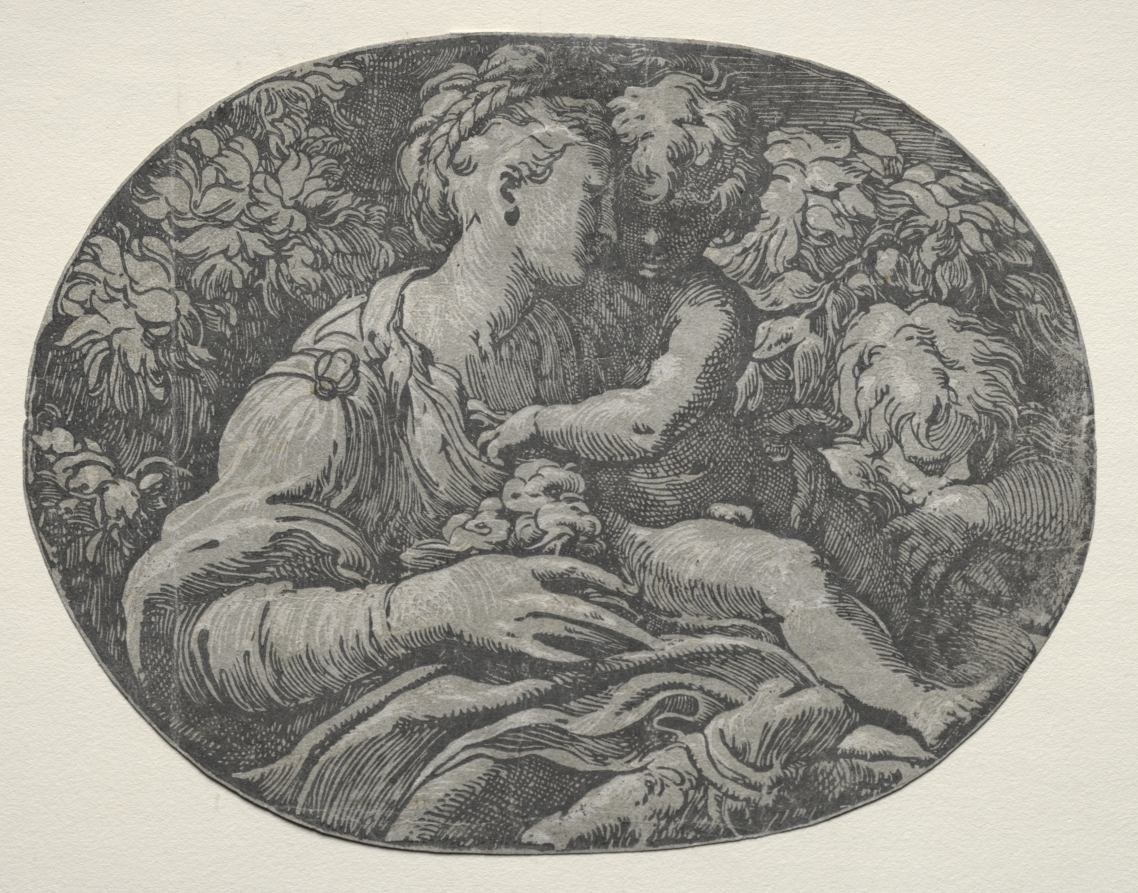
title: Virgin and Child with St. John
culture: Italy, 16th century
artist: Antonio da Trento (Italian, c. 1508–c. 1550)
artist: after Parmigianino (Italian, 1503–1540)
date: 1500s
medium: chiaroscuro woodcut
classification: Print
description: Enclosed in an oval and intimate space, the Virgin Mary holds Christ the Child on her lap, with the young Saint John the Baptist arranged to one side. Jesus's right sole is placed on the frame, creating the illusion his foot is resting on it. In his chiaroscuro woodcuts, Antonio da Trento usually favored gray ink rather than black for the line block, aiming for a pale effect and tonal unity. Furthermore, he exploited fine webs of hatching and cross-hatching to create contrasts between vigorous highlights and deep dark shadows. In all of these printing refinements, Antonio's technique was similar to Ugo da Carpi's chiaroscuro method, suggesting a close working relationship between these two printmakers.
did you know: This chiaroscuro woodcut is designed after a preliminary drawing by Parmigianino, only differing in the addition of a detailed background of lush foliage.